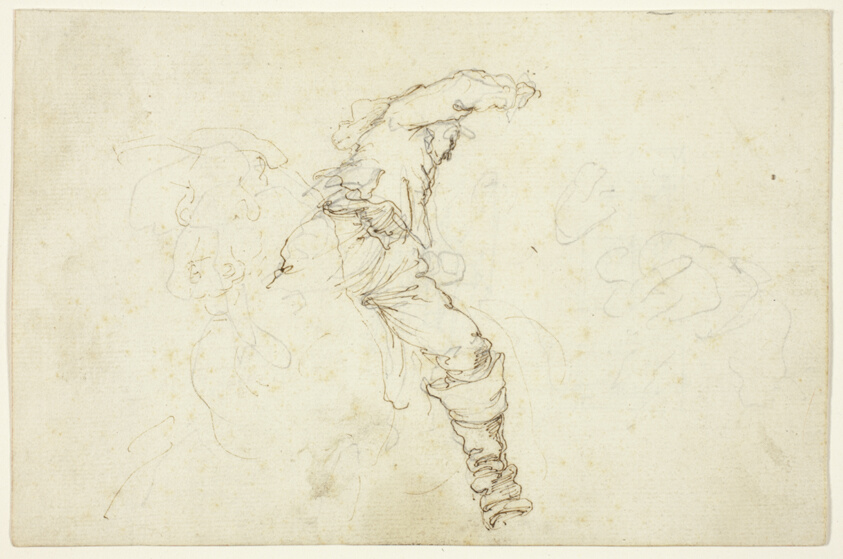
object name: Drawing and Watercolor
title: Man on Horseback, Raising Right Arm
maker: Stefano della Bella (Italian, 1610-1664)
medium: Pen and brown ink, with graphite, on ivory laid paper, laid down on ivory laid paper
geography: Italy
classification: pen and ink drawings; drawings (visual works); prints and drawing